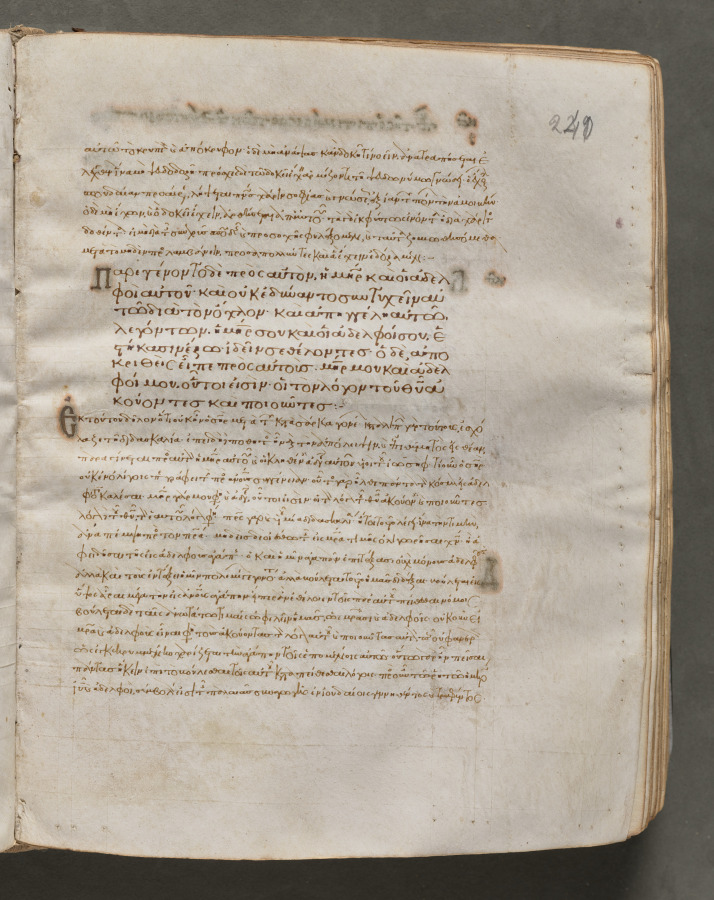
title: Text, folio 240 (recto), from a Gospel Book with Commentaries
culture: Byzantium, Constantinople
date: c. 1000–1100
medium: ink, tempera, and gold on vellum; leather binding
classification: Bound Volume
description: Each of the four gospels in this book opens on a page with brilliantly illuminated borders depicting the author of the text as well as birds—principally peacocks, symbols of the immortality of the soul—and fountains, representing the fountain of life and the salvation of the soul. This volume consists of 428 leaves with texts in Greek. Its level of sophistication suggests that it was probably written and decorated in a monastery in Constantinople.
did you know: Gospel books were carried in procession through Byzantine churches.